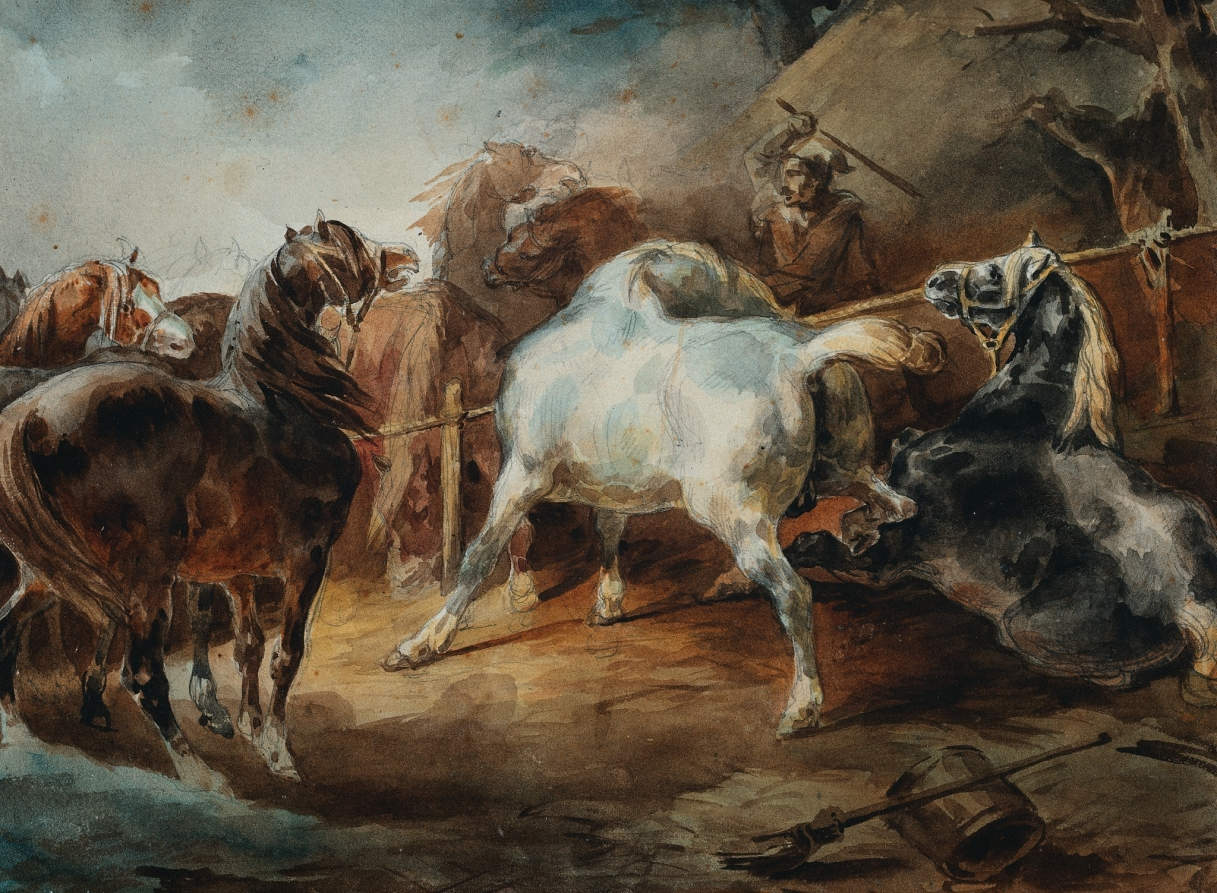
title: Fighting Horses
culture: France, 19th century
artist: Théodore Géricault (French, 1791–1824)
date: c. 1820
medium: watercolor over graphite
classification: Drawing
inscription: on old label (now removed), in brown ink: This drawing by Géricault was / the property of The Marquis of / Hertford & left to Sir Richard / Wallace, who in time bequethed / it to Sir John Murray Scott / Bart: / Purchased by Leggatt Bros at / the sale of Sir John Murray / Scott's Drawings etc, at 5 / Connaught Place Marble Arch. / Feb: 9th 1914.; on old label (now removed): across top, in graphite: 41 [circled] Dr. Bellingham Smith; down center, in brown ink: J. L. A. T. Géricault / Horses Fighting / Colles Marquess of Hertford / Sir Richard Wallace and / Sir John Murray Scott / Exhib. Burlington Fine Arts Club / 1922 . No 52. / Pictures drawings & Sculptures of French School / of the last 100 years.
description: Théodore Géricault turned away from traditional subjects such as mythology and the Bible in favor of modernity, emotion, and drama. He was fascinated by the power and physical beauty of horses and depicted them often. Géricault himself was an avid rider and his paintings and drawings on this theme are characterized by vigor and movement. In this watercolor, he focused on a conflict, in which a groom struggles to separate a pair of fighting horses—a scene that appeared only a few times throughout his many interpretations of similar subjects. A sketchbook, now in the collection of the Art Institute of Chicago, shows that the artist carefully studied the animals, including the kicking white stallion at center, in graphite before beginning this finished work.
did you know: Théodore Géricault began this work with sketches from life, which became a graphite underdrawing beneath the watercolors.